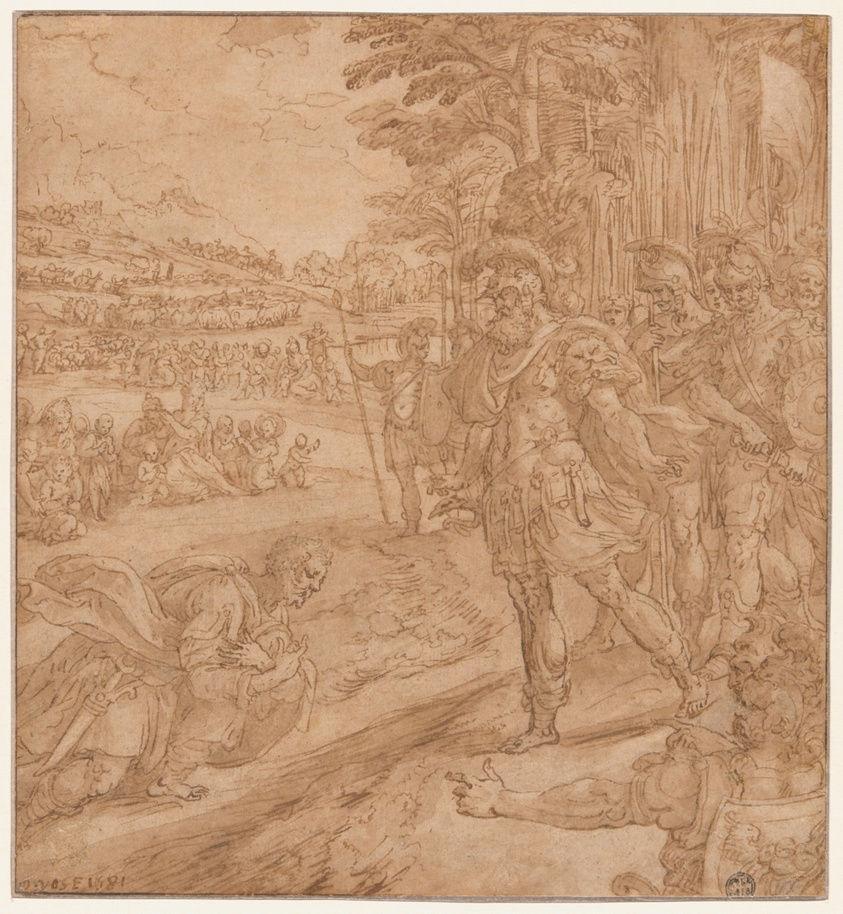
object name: Drawing and Watercolor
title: The Reconciliation of Jacob and Esau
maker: Maerten de Vos; Flemish, 1532–1603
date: 1581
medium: Pen and brown ink and brush and brown wash on cream laid paper, incised with a stylus for transfer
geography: Flanders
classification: pen and ink drawings; prints and drawing; paper